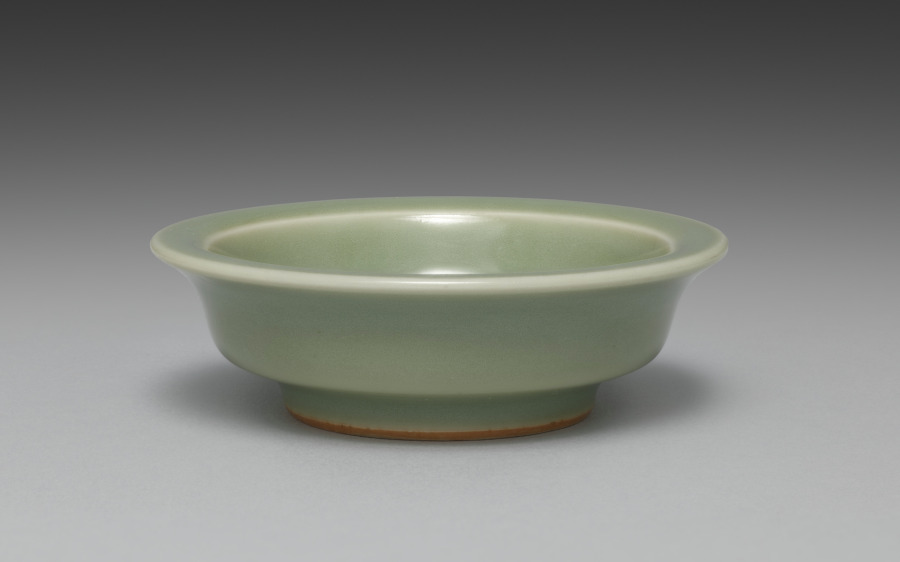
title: Saucer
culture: Japan, Meiji period (1868–1912)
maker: Seifū Yohei III (Japanese, 1851–1914)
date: 1893–1914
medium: One from a set of ten dishes; porcelain with green glaze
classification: Ceramic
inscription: 清風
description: Yohei III’s main output for his sophisticated clientele was in the form of tea sets and dining sets. He created a range of dishes in green glazes. He often produced in pairs, sets of five, or sets of ten. For this set of ten small dishes in a simple, round form that emphasizes the glaze above all, the box lid designates the piece as seiji, or green-glazed porcelain, using a general term for the extensive palette of green glazes often called celadon in English. The box lid further identifies the dishes themselves as tōchō, literally “bean-sized saucers,” a size that makes them suitable for dipping sauces.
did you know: The ten dishes in this set are stored in stacks of five in a two-compartment box.